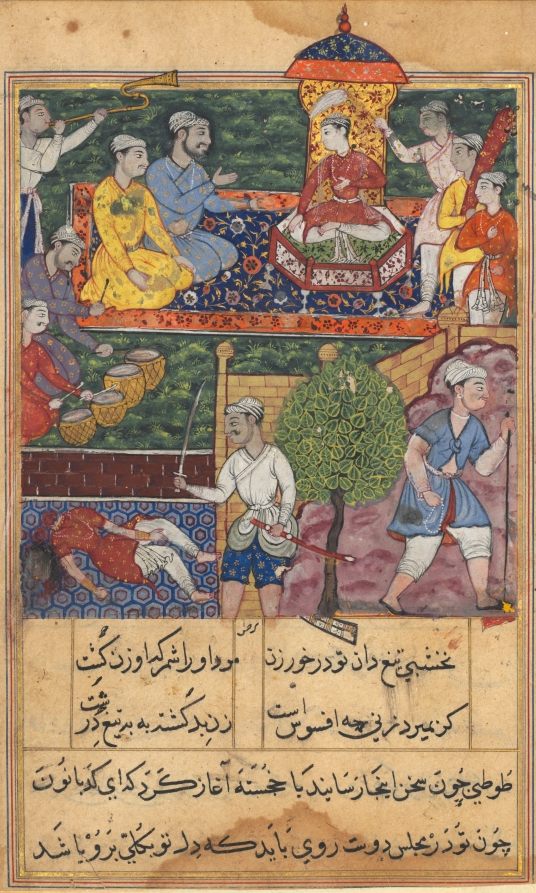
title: The young prince is crowned and the wicked handmaiden is executed, from a Tuti-nama (Tales of a Parrot): Eighth Night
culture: Mughal India, court of Akbar (reigned 1556–1605)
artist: Suraju (Indian)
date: c. 1560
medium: gum tempera, ink, and gold on paper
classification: Painting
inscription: surjū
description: In the concluding illustration to the parrot's story on the eighth night, the prince is enthroned at the top of the composition to the accompaniment of musical fanfare. His father the king, in blue at the lower right, heads off to retirement in the forest, as was customary, with his walking stick and prayer beads. The ends of garments visible below the picture plane reveal that another earlier composition was painted over—a common practice throughout the Tales of a Parrot in which new recruits to the atelier were experimenting with a new style.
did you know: The king, holding a staff and rosary, is leaving to begin life of retirement as an ascetic.